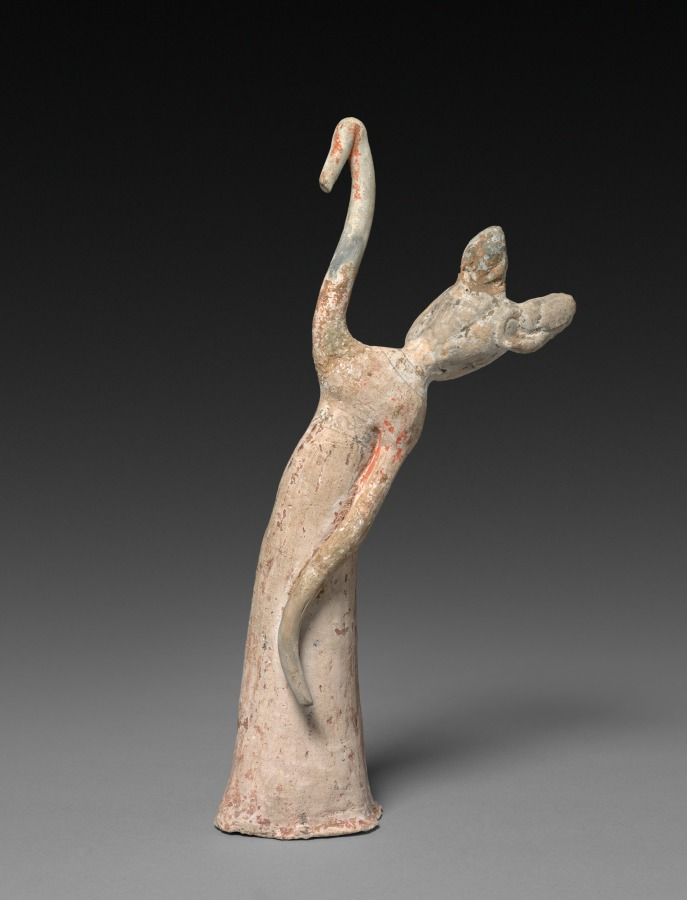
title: Female Dancer: Tomb Figurine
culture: China, Tang dynasty (618-907)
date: 650–700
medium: earthenware with polychromy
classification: Sculpture